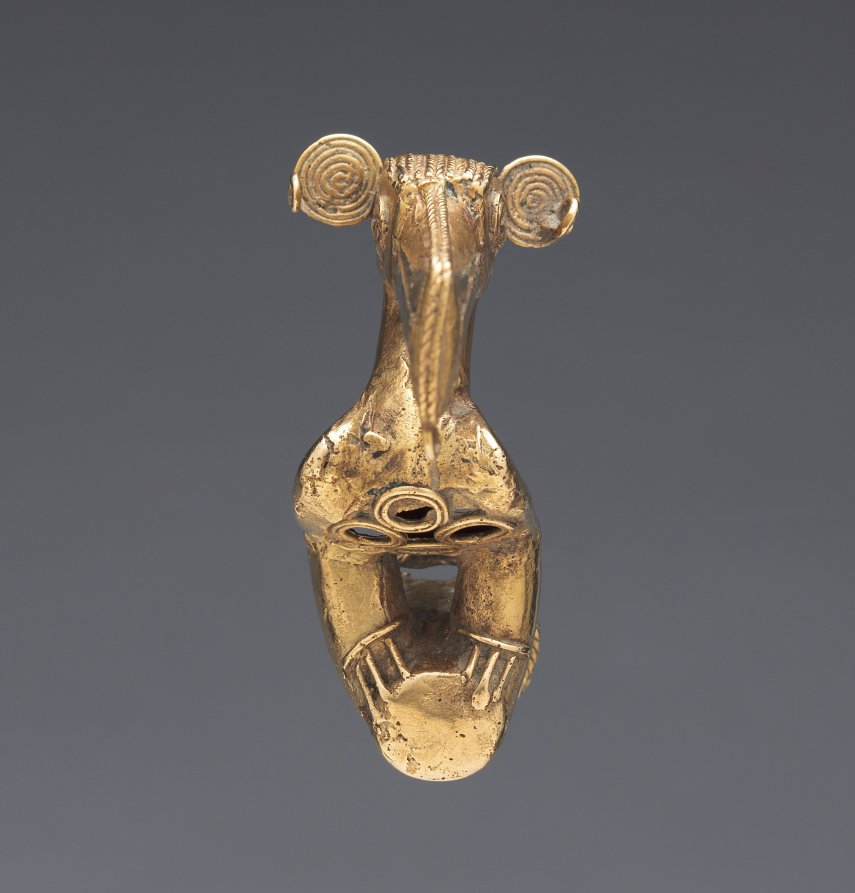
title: Staff Head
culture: Colombia, Sinú style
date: 400–1000 CE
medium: cast gold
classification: Metalwork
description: These finials probably fit over the ends of wooden staffs, emblems of rank. Unique to the Sinú area are finials with an image, often a bird, at a right angle to the base. This orientation suggests that the finials served as the finger grips of ceremonial spear throwers.